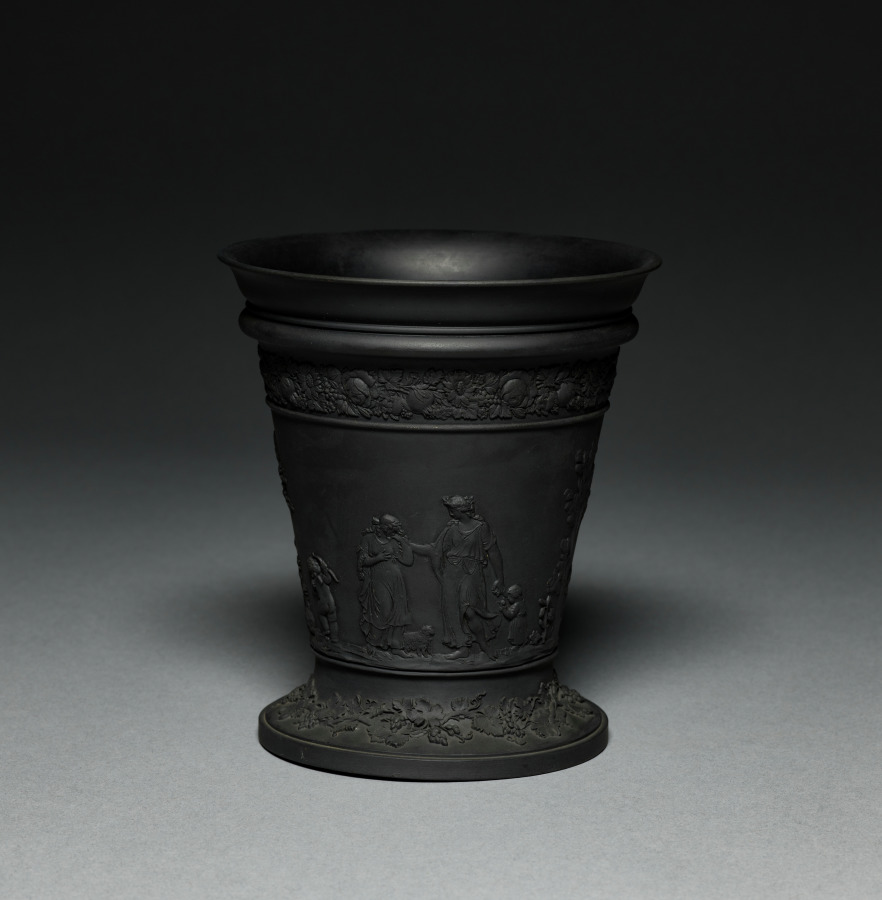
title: Jardiniere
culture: England, Staffordshire, 18th century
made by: Wedgwood Factory (British)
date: late 1700s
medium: black basalt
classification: Ceramic